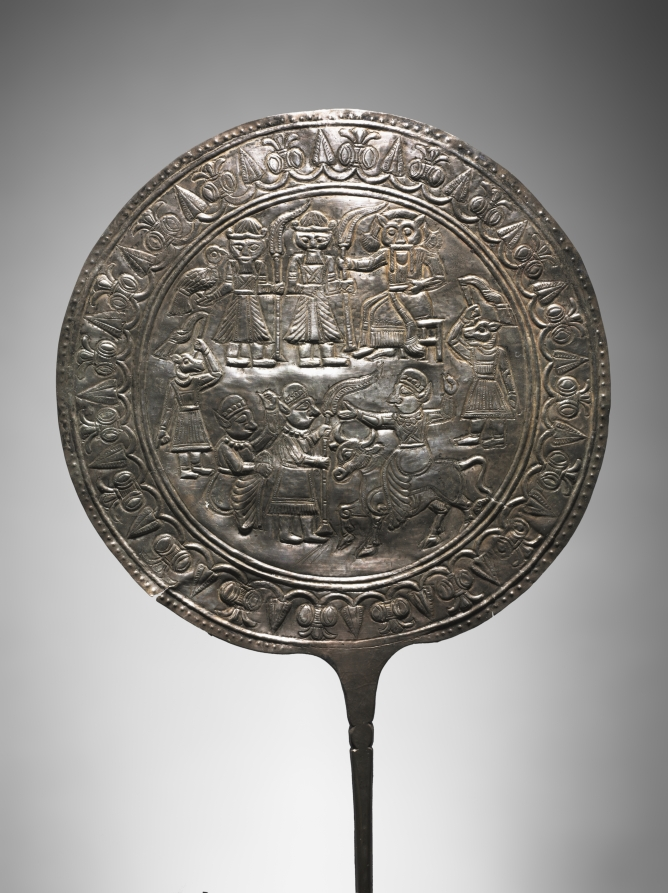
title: Votive Pin with Decorated Disc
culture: Iran, Luristan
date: 800–600 BCE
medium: silver, repoussé and incised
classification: Metalwork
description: A complex mythological scene unfolds on the decorative disc of this silver pin. On the top register, two bearded figures carrying palm fronds and a bird extend a frond to a seated lion-headed man. Below, two figures holding fronds approach a man riding a bull. Two animal-headed beings flank the registers and perhaps hold banners in their hands. A pattern of stylized lotus buds and blossoms decorates the disk’s rim. The scene may represent a Mesopotamian or Iranian myth. The pin was made with the repoussé technique by hammering designs into the back.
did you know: Luristan votive pins were sometimes found pushed into the walls of religious sanctuaries.